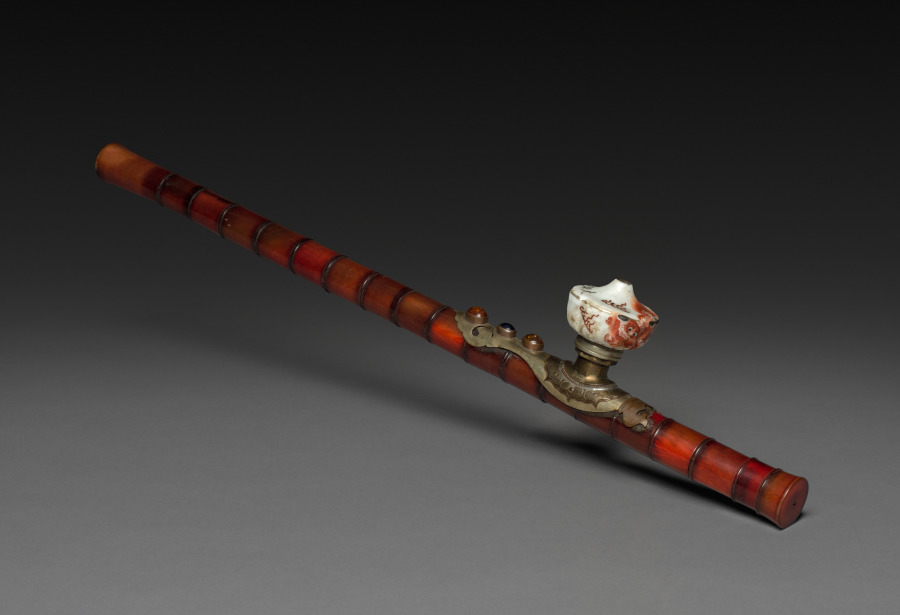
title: Opium Pipe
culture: China, Qing dynasty (1644-1911)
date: 1800s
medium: horn (?) with silver decoration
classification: Miscellaneous